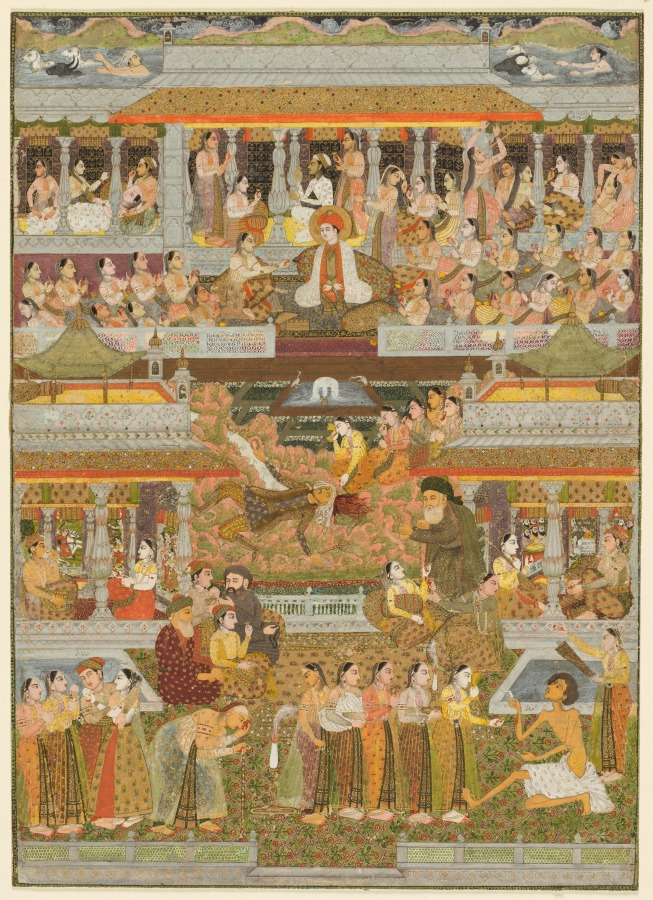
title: Lovers and beloveds: A composite of scenes from Persian, Urdu, and Sanskrit literature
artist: Chitarman II (Indian, c. 1680–с. 1750)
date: c. 1735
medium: Gum tempera and gold on paper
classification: Painting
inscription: Persian inscriptions throughout, in nasta‘liq script: Top left: The celebrated lover Ranjha; Top right, above awning: The notable ladies of the city falling into a swoon having caught sight of Joseph’s beauteous countenance; Top center, on pillar beneath canopy: The celebrated lover Vamiq; On another pillar, behind the woman’s head: The celebrated beloved ‘Azra; Upper left, on pillar: King Nala, the lover; Central figure with halo: The coming from the prison and sitting [in state] of the Lord Joseph the Prophet, with the women of the town cutting the palms of their hands and falling down unconscious; Left of center: [. . . cutting palms . . . wine cups fell from their hands . . . state of wonderment . . .]; Central pavilion at left: Sassi, the beloved the lover [Punnun]; Below central figure of Joseph: The stream of milk Shirin the beloved, weeping The death of Farhad, the lover; Lower right, in front of bearded man: Hafiz of Shiraz; Below his decanter: The stick of candy [referring to the woman with whom, according to popular lore, Hafiz was supposed to have fallen in love as a youth]; Behind the pavilion at right: Bride descending into a grave . . .; On the white railing to the left: Khwaja Bu Ali . . .; Bottom left: Queen Padmavati, the beloved, King Ratnasena, the lover; Bottom right: Majnun, the lover; On page held by Majnun: Say, “He is Allah, who is One, Allah the eternal refuge. He neither begets nor is born, Nor is there to Him any equivalent.” [Qur'an, chapter 112]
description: The figure of Joseph, identified by his halo, sits in the center near the top of this painting of heroes and heroines of ten different Persian, Urdu, and Sanskrit romances. The depicted scene occurs after Joseph has been purchased by Zulaykha in Egypt. Zulaykha, wishing to show him off to her friends and acquaintances, invites them to her home where she supplies oranges and knives. When the women see Joseph, they all are so distracted by his divine beauty that they accidentally cut their hands while peeling their oranges, but remain mesmerized by his appearance. The dramatic scene in the center is from the Persian romance of Khusrau and Shirin, in which Farhad, a stonecutter who loved Shirin, threw himself to his death from a mountaintop after hearing news of Shirin’s death, falsely sent to him from his rival Khusrau. The emaciated Majnun is in the lower right corner. Every vignette has been identified with a tiny Persian inscription.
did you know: Below the bearded poet Hafiz is the woman he loved; her name was Stick of Candy.